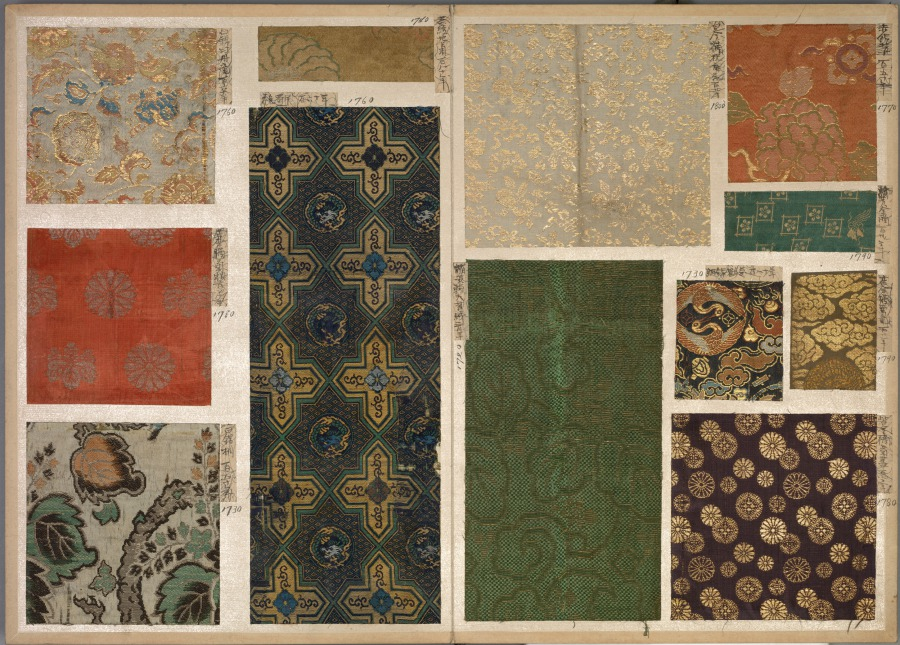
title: Album of Textile Samples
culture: Japan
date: 1790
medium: silk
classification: Textile